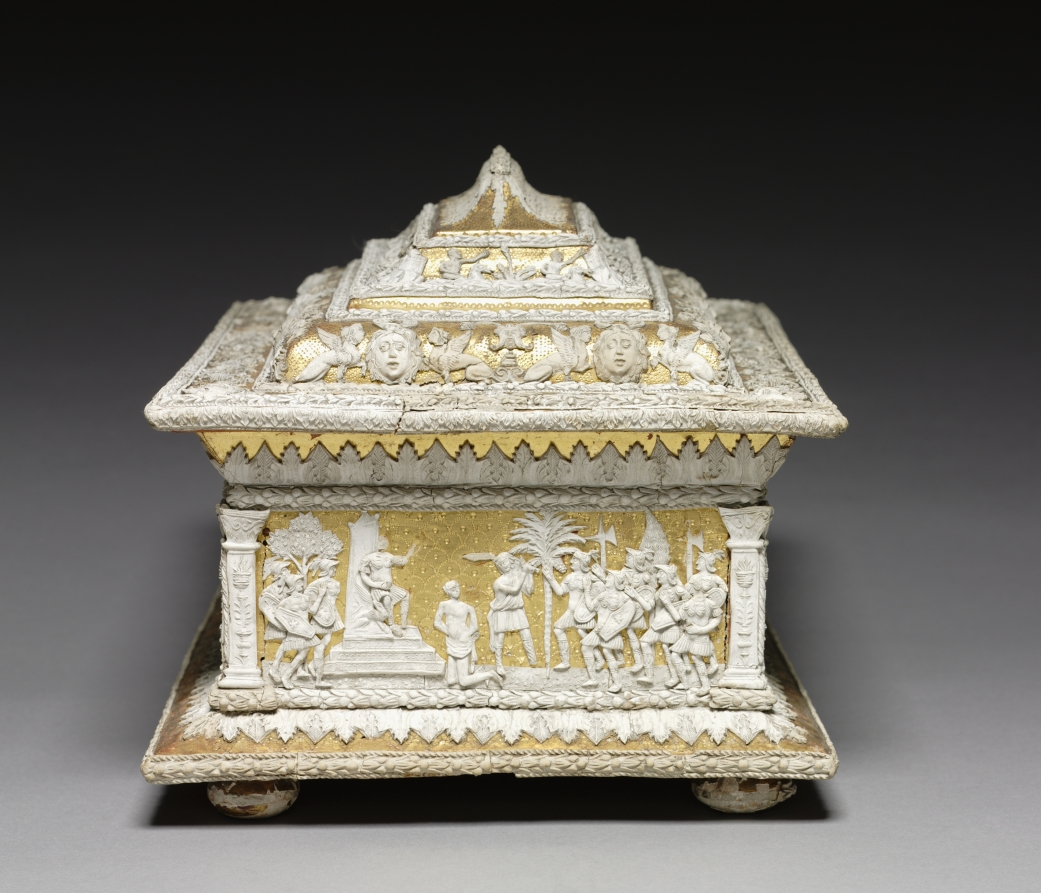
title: Box with Military Scenes from Antiquity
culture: Workshop of the Cleveland Casket (Italy), 16th century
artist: Workshop of the Cleveland Casket (Italian)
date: c. 1520–1530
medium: pastiglia on gilded wood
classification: Furniture and woodwork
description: This box features four military scenes from antiquity: an allegiance, a triumph, a battle, and an execution.